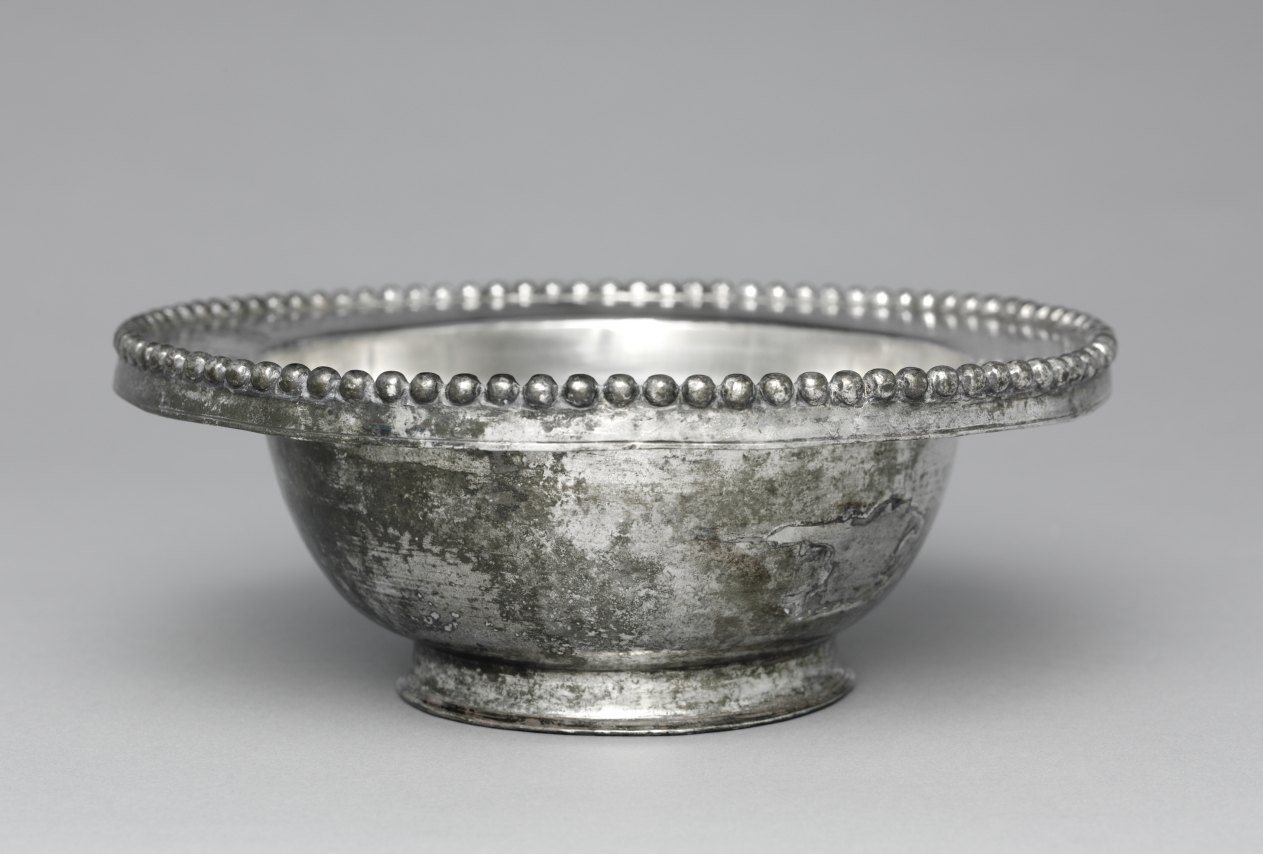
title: Bowl with Beaded Rim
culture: Byzantium, Syria(?), Byzantine period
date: 300–500 CE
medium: silver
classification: Metalwork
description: This bowl was probably intended for use in a private home, perhaps a fashionable villa on the Mediterranean coast. Wealthy Romans stored a variety of silver vessels and implements for entertaining and enjoyed using them while eating and drinking at social events. This bowl is decorated with a beaded rim, a feature often found on domestic silver bowls of this period. The basic shape was formed first by hammering. Then the bowl was polished and chased while it turned on a lathe. The beaded decoration was achieved by hammering the silver into a mold.